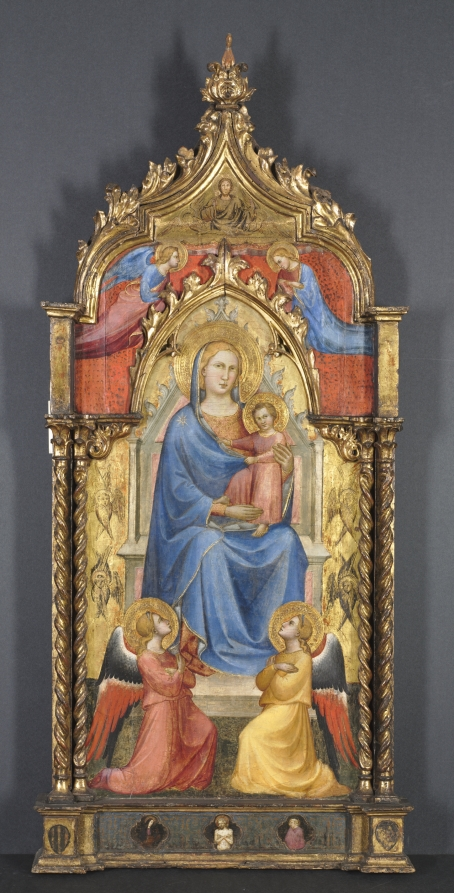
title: Virgin and Child with Angels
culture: Italy, early 15th Century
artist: Spinello Aretino (Italian, 1350/52–1410)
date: 1405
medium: tempera and gold on wood panel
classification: Painting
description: This central panel from an altarpiece shows the Madonna seated on a throne with the infant Christ, surrounded by kneeling angels and six-winged seraphim. Below is an image of the dead Christ flanked by the Virgin Mary and Saint John. Above the arch is the Blessing Christ after his ascent into heaven and two more angels who gaze down on the main scene. Together these images extol the role of the Madonna in the redemption of humankind. Spinello Aretino was a painter of devotional panels, altarpieces, and frescos. His most important commissions were painted in Arezzo, Lucca, Florence, Pisa, and Siena. His concern for space and the powerful outlines of his figures reflect a greater understanding of the principles developed by Giotto and his contemporaries, yet his keen sense of decoration reveals an equal awareness of Sienese painting.